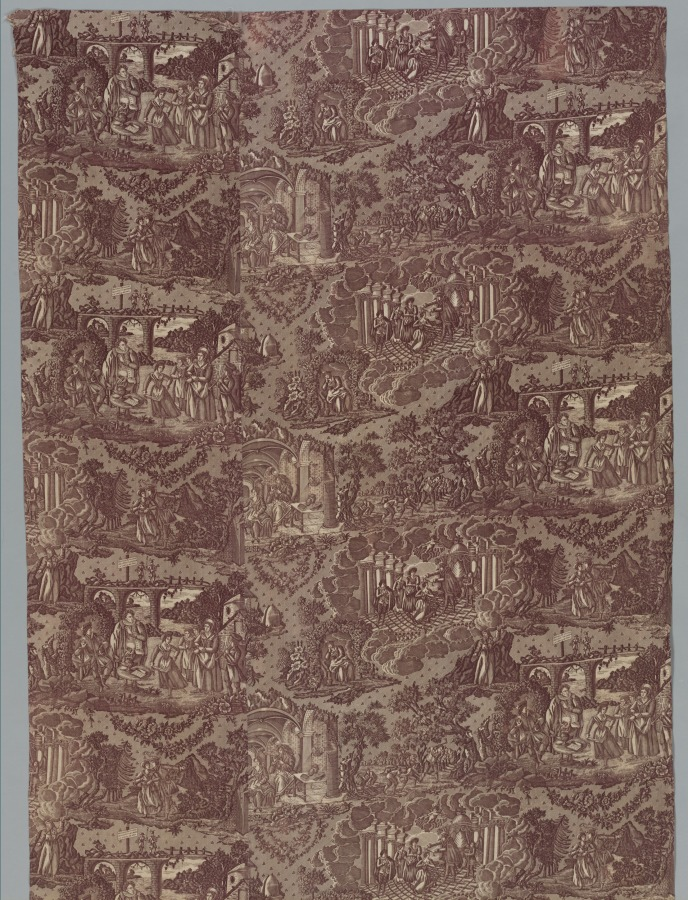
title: "La Treve de Dieu" (The Truce of God)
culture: France, Nantes or Rouen ?, early 19th century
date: c. 1825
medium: copperplate printed cotton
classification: Textile